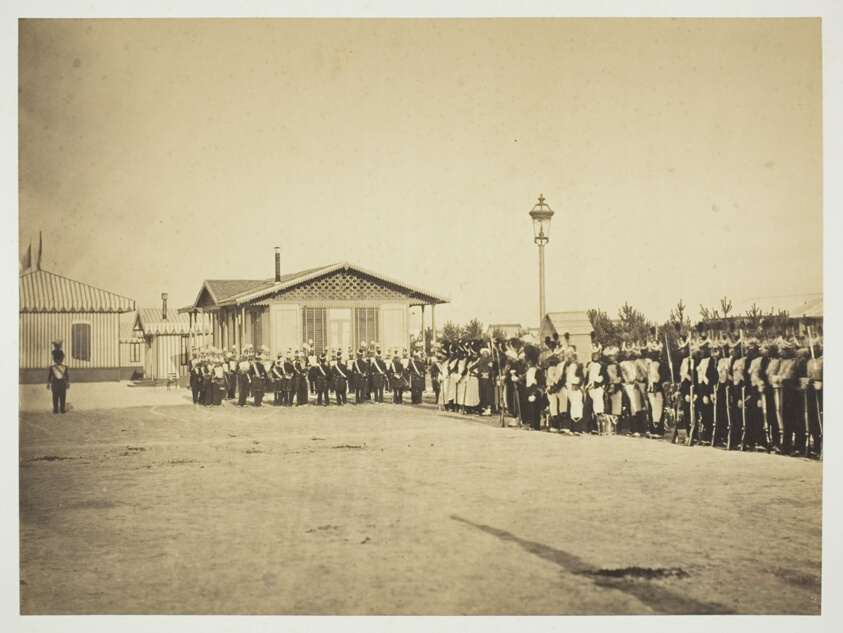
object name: Photograph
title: Light-Infantry Soldiers, Camp de Châlons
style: 19th century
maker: Gustave Le Gray (French, 1820–1884)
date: 1857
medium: Albumen print, from the album "Souvenirs du Camp de Châlons"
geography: France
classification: albumen silver print; photographic process; photography; photograph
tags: Paris